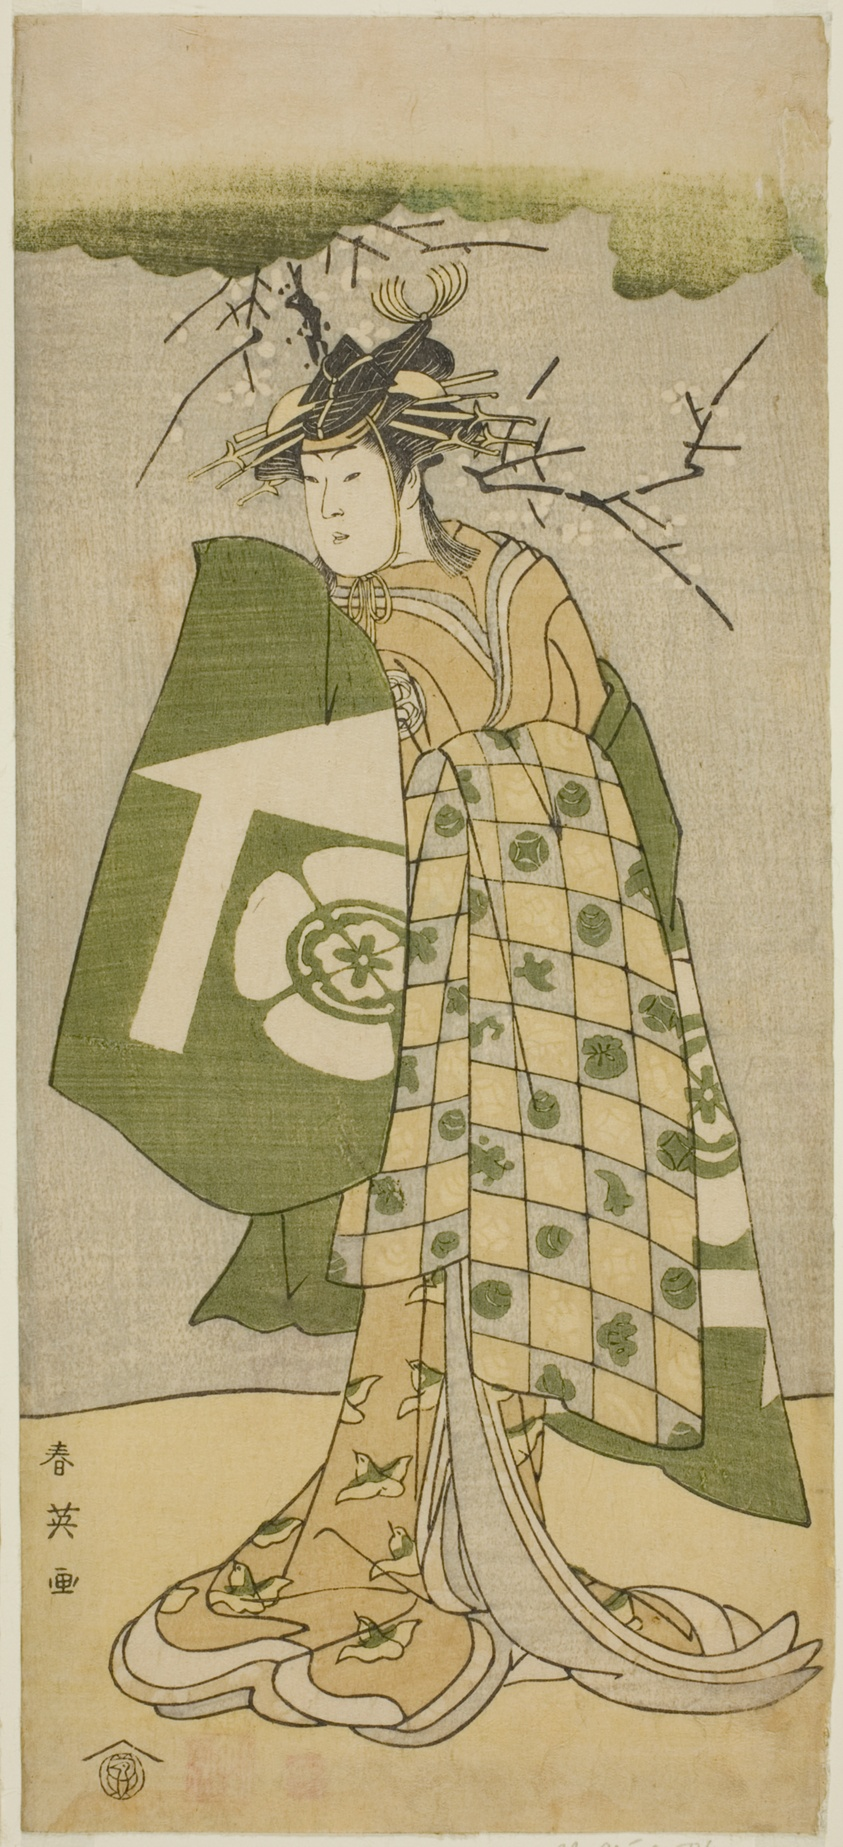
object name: Print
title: The Actor Osagawa Tsuneyo II as Oiso no Tora in the Play Gohiiki no Hana Aikyo Soga, Performed at the Kawarazaki Theater in the First Month, 1794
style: Japanese (culture or style)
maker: Katsukawa Shun'ei (Japanese, 1762-1819)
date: c. 1794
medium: Color woodblock print; hosoban; right sheet of diptych (left: 1939.923)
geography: Japan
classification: woodblock print; print; asian art